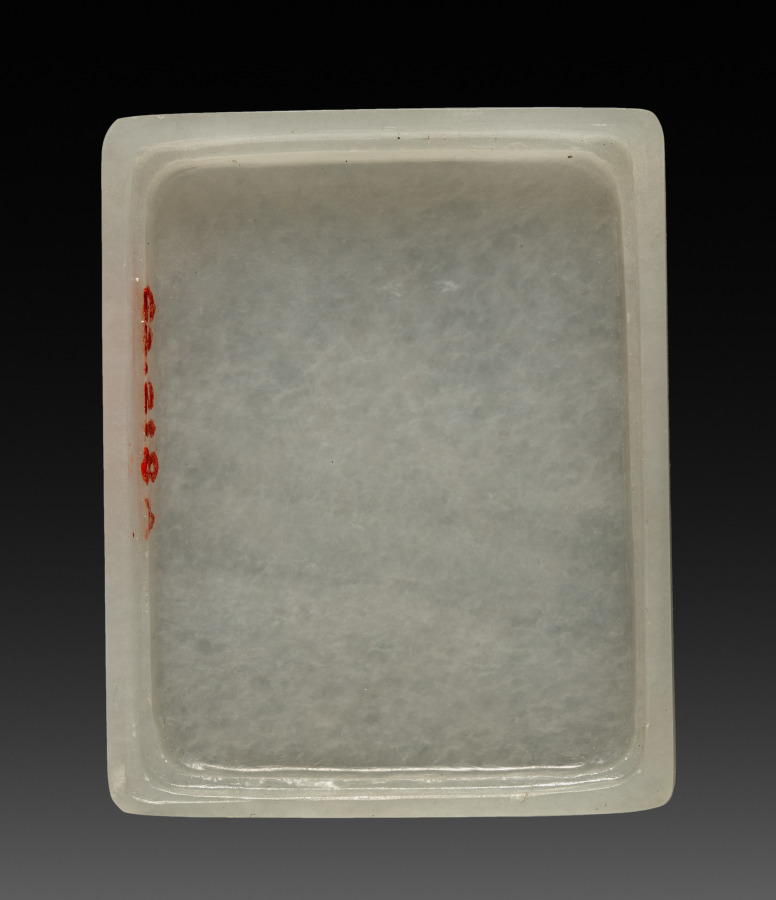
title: Seal Box (lid)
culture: China, Qing dynasty (1644-1911)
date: 1644–1700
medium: jade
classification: Jade